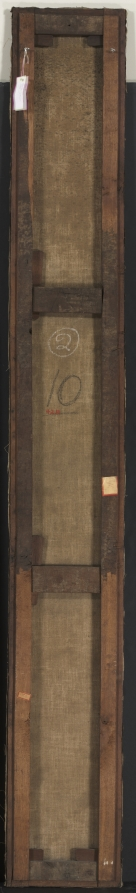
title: Decorative Panel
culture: France, 18th century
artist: Pierre Rousseau (French, 1751–1829)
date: 1790s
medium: oil on canvas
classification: Painting